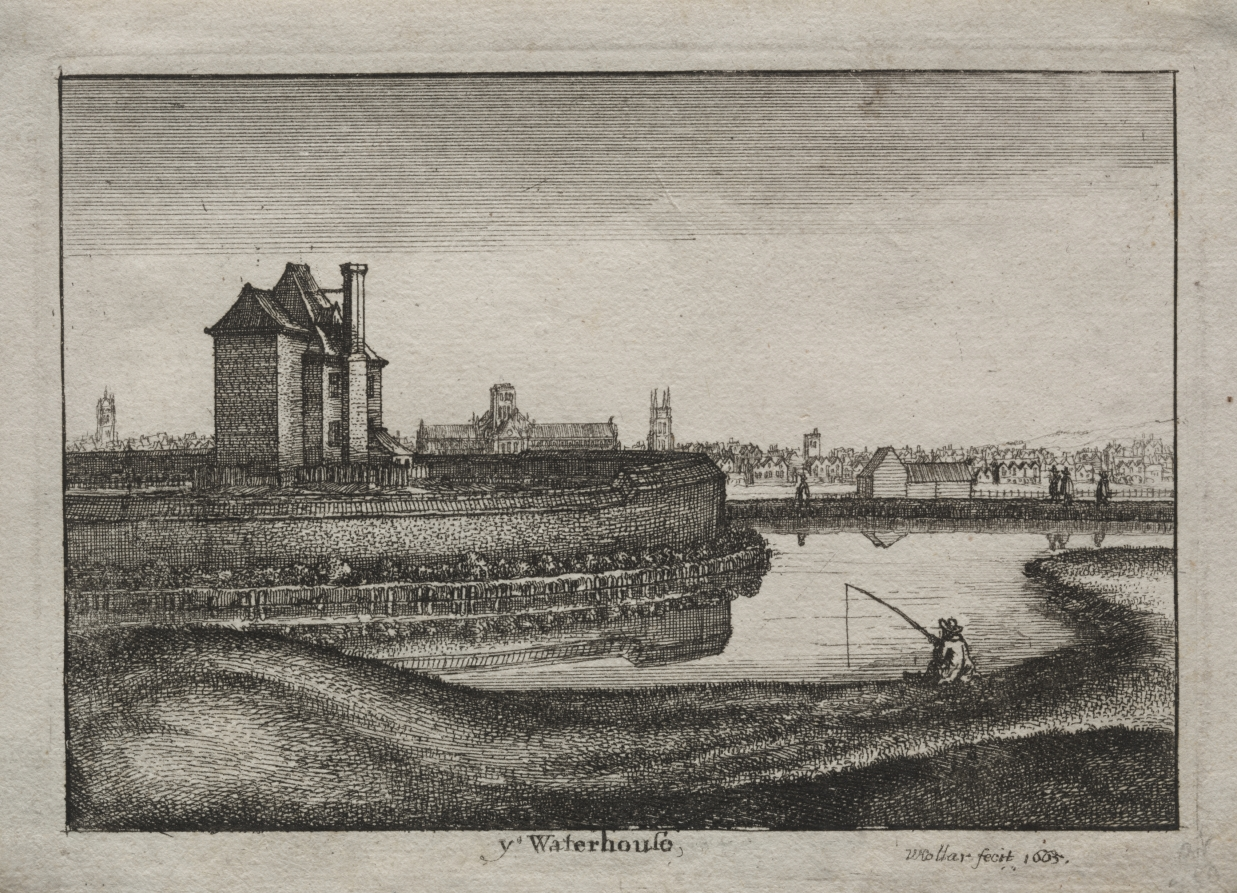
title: The Waterhouse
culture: Bohemia, 17th century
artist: Wenceslaus Hollar (Bohemian, 1607–1677)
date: 1665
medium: etching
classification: Print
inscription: inscribed, lower center, in plate: ye Waterhouse; inscribed, lower right, in plate: W. Hollar fecit 1665.